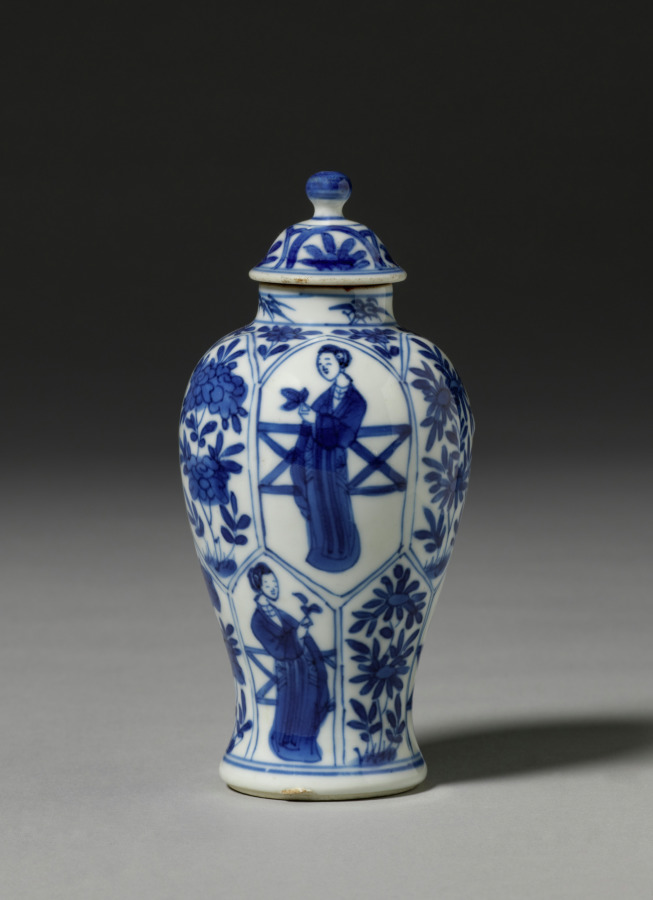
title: Jar with Cover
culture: China, Qing dynasty (1644-1911)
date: 19th Century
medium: porcelain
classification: Ceramic